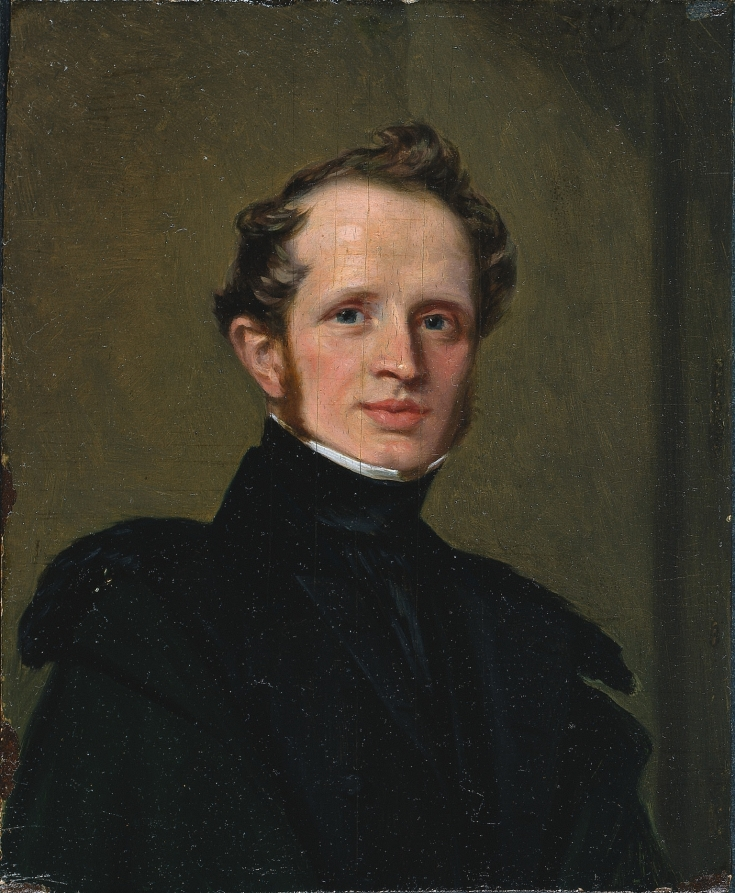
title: Henry Francis Playter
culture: Netherlands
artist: Pieter Christoffel Wonder (Dutch, 1780–1852)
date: c. 1837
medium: oil on wood panel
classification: Painting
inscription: Signed in brown paint in upper right corner: P.C.W. f